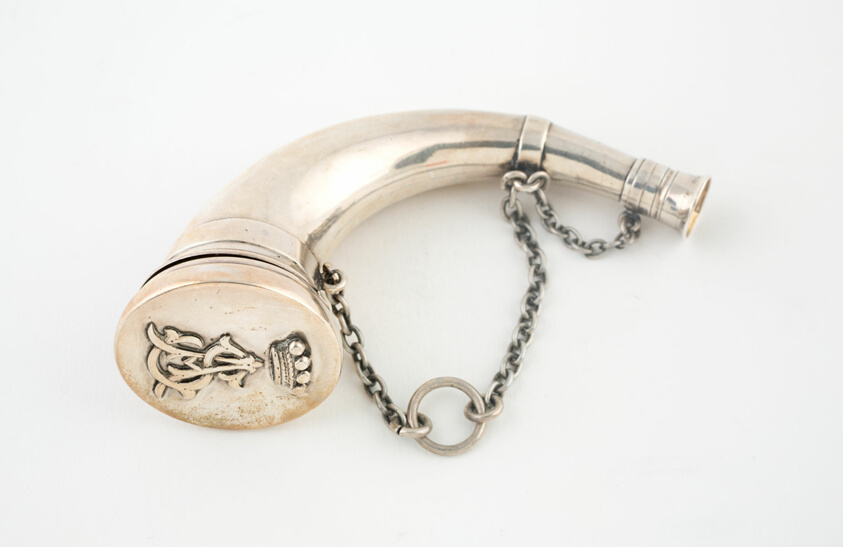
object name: Metalwork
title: Vinaigrette in the Form of a Hunting Horn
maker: Marked SM; London, England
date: c. 1870/71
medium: Silver and silver gilt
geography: London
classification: container for personal use; vinaigrette (container for health care); european decorative arts; metalwork; silver; decorative object/ornament